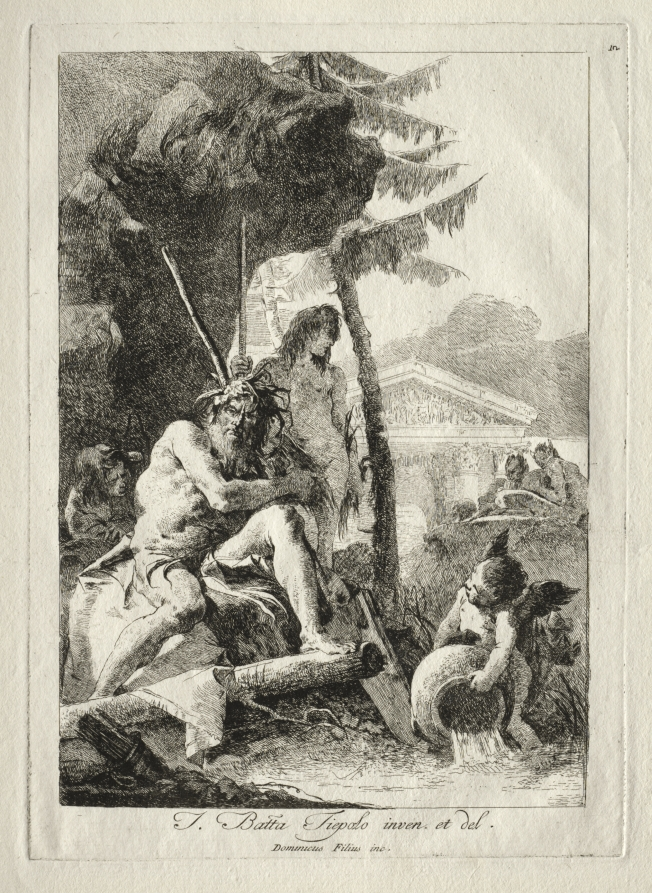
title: Figures Fluviales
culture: Italy, 18th century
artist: Giovanni Domenico Tiepolo (Italian, 1727–1804)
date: late 1700s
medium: etching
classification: Print